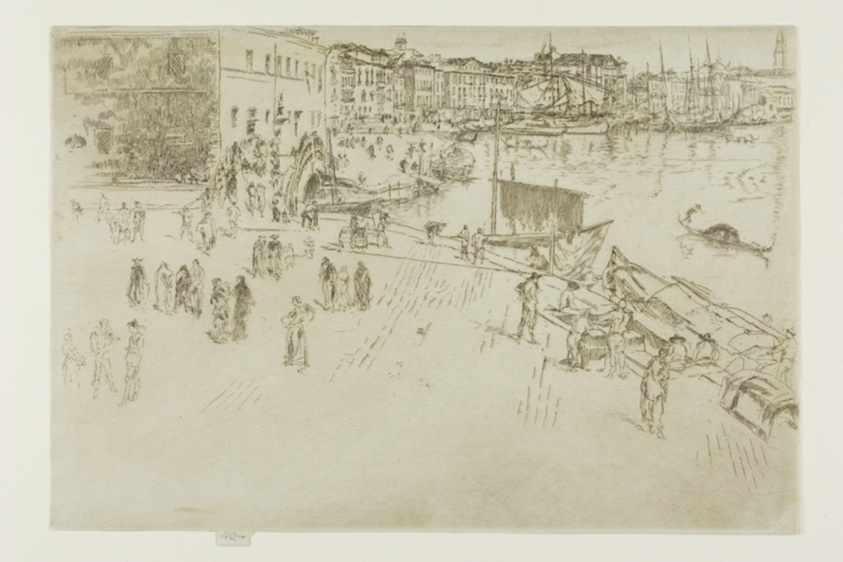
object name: Print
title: The Riva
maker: James McNeill Whistler (American, 1834-1903)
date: 1879/80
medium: Etching and drypoint with foul biting in brown ink on ivory laid paper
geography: United States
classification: etching; engraving; print; prints and drawing; paper; drypoint